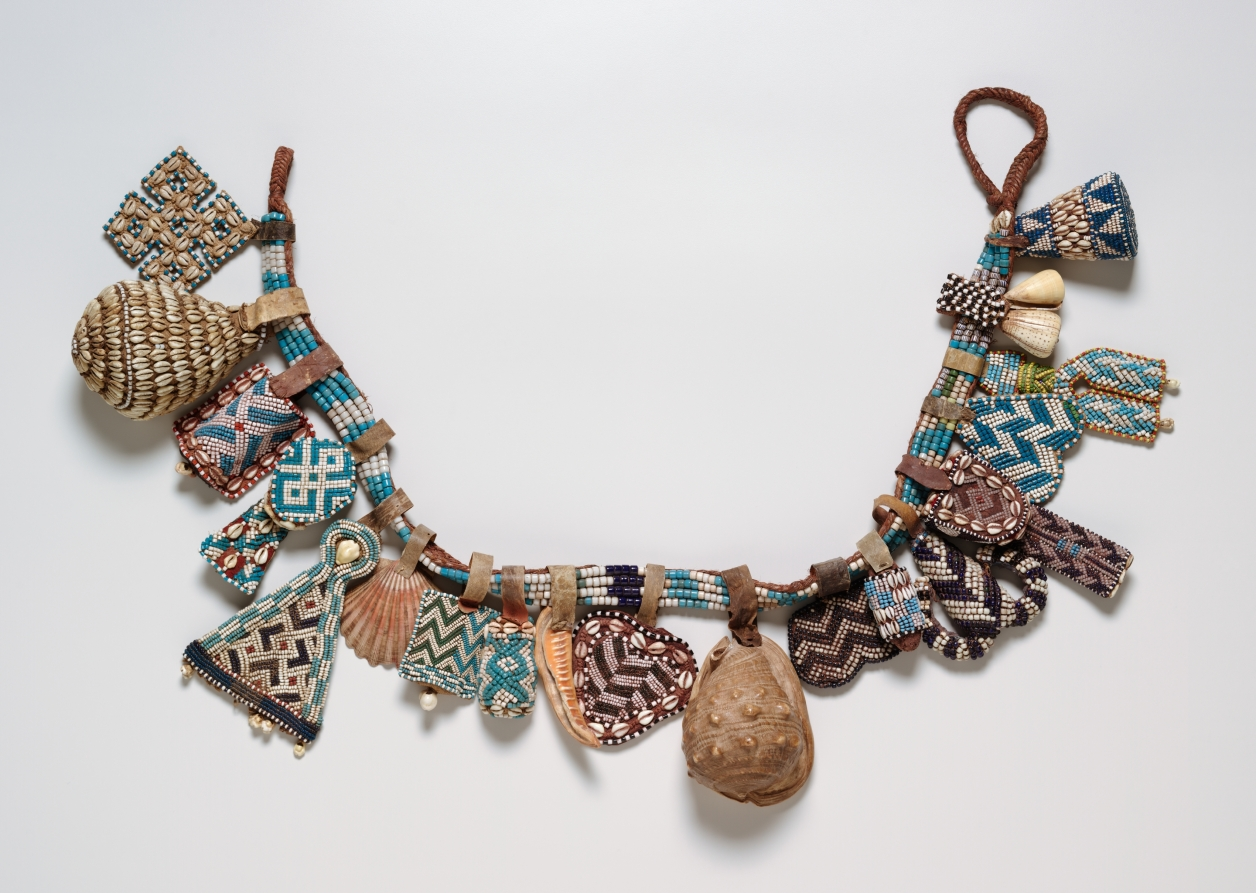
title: Royal Belt (yet)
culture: Africa, Central Africa, Democratic Republic of Congo, Kuba Kingdom, Kuba-style maker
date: possibly early 1900s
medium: Plant fiber, rawhide or leather, glass beads, seashells, cowrie shells, cloth, and colorant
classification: Garment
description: Attributed to Kuba peoples of southeast Democratic Republic of Congo, this prestige belt boasts superb craftsmanship. The accumulation of a variety of materials indicates the high status of its wearer. It is made from leather strips and finely accessorized with a combination of intricately patterned bead designs, cowries, seashells, and bells. It would have been worn over a large raffia skirt by a man during ceremonial occasions. It was acquired from the Belgian dealer Jacques Hautelet in 1994.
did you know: Cowry shells, a type of currency used in the Kuba Kingdom in Central Africa, decorate this belt made for a king. The intricate patterns and colors of the beads indicate the high status of the wearer as well as the wealth of his kingdom.